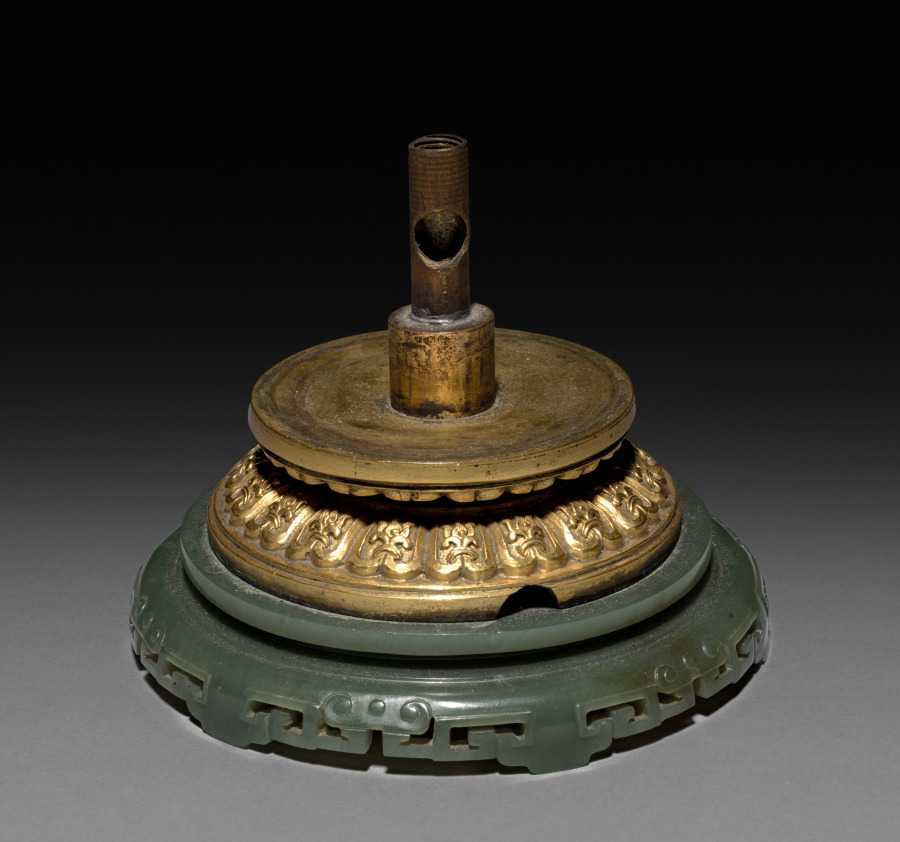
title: Cylinder (base)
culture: China, Qing dynasty (1644-1911) or Republican period (1912-49)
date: 1800–1940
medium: carved jade and gilt bronze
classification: Jade